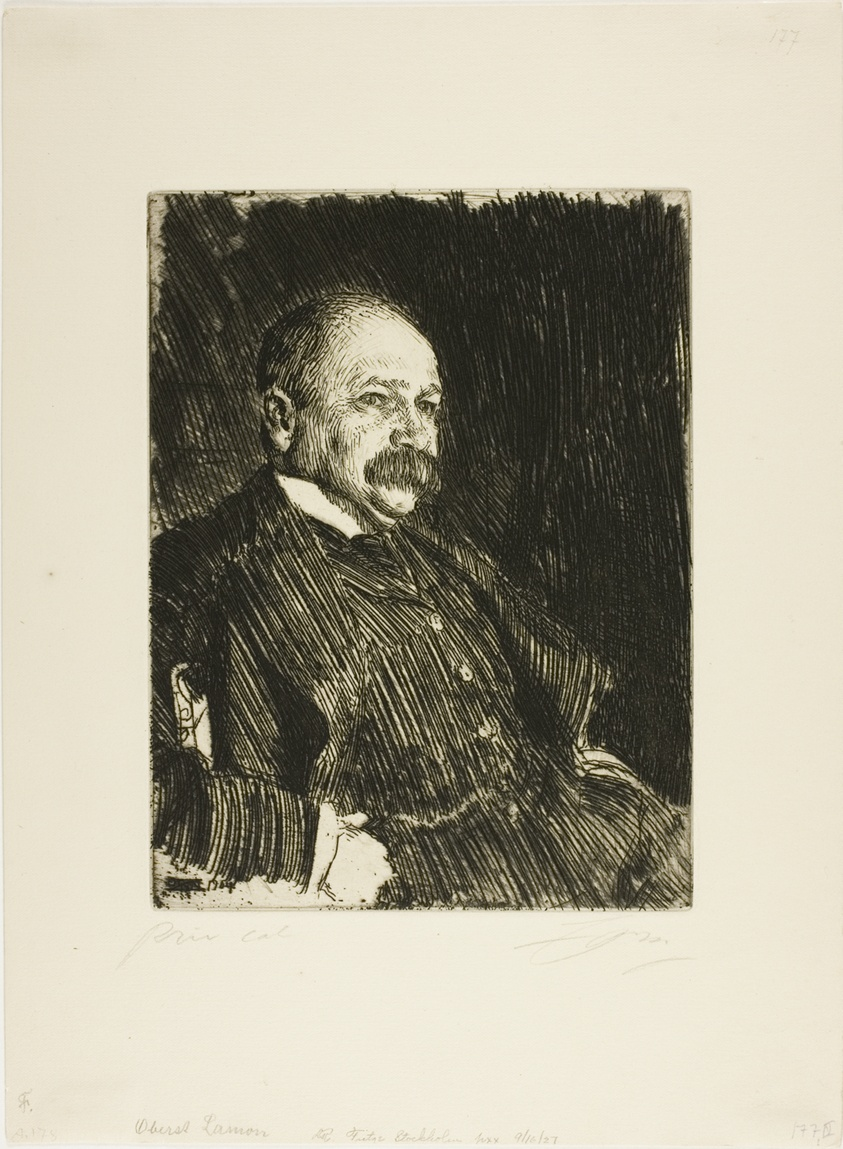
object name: Print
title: Colonel Lamont III (Bust)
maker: Anders Zorn (Swedish, 1860-1920)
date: 1904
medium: Etching on ivory laid paper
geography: Sweden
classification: etching; print; prints and drawing